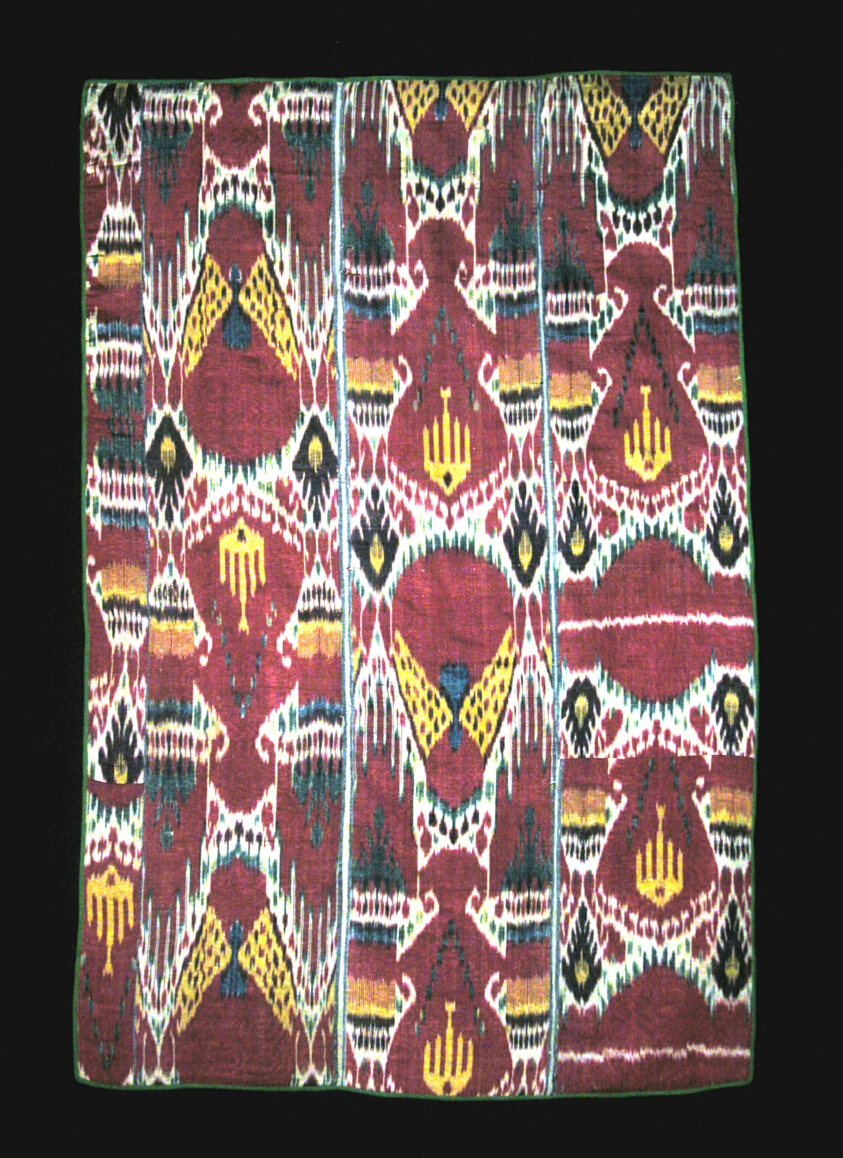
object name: Coverings and Hangings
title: Wall Hanging Composed of Three Panels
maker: Uzbekistan, Bukhara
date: 1825/75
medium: Silk, warp-faced plain weave; warp-dyed (ikat); binding: plain weave; lining on reverse: cotton, warp-float faced satin weave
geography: Uzbekistan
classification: textile; weaving